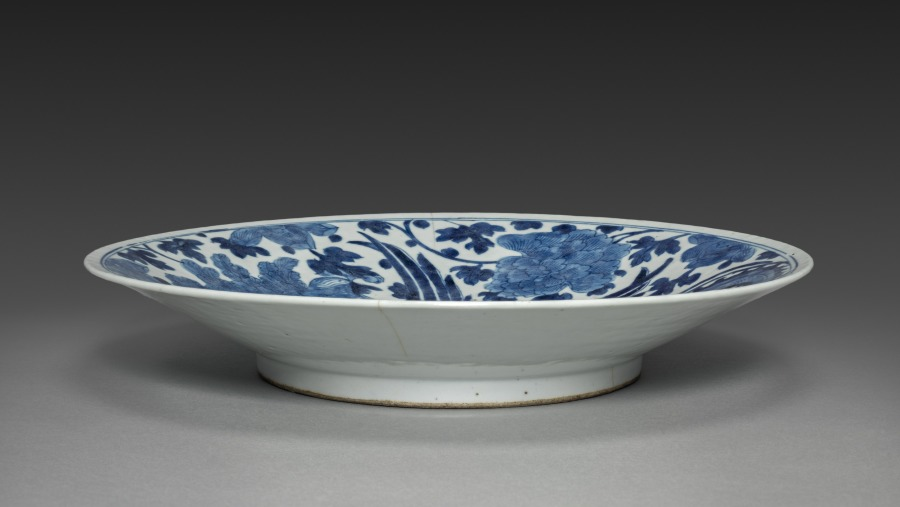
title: Plate: Arita Ware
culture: Japan, Edo period (1615–1868)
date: 1615–1868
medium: porcelain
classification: Ceramic